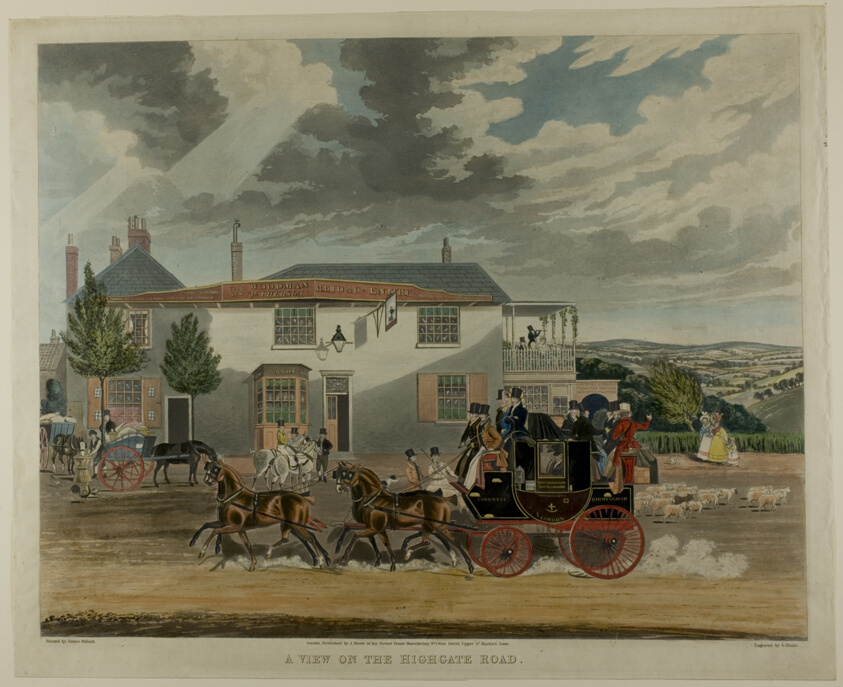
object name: Print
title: A View on the Highgate Road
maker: Charles Hunt (English, 1803-1877); after James Pollard (English, 1797-1867); published by John Moore (English, active 1829-1836)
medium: Etching and aquatint, with hand coloring, on paper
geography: England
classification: aquatint; print; prints and drawing